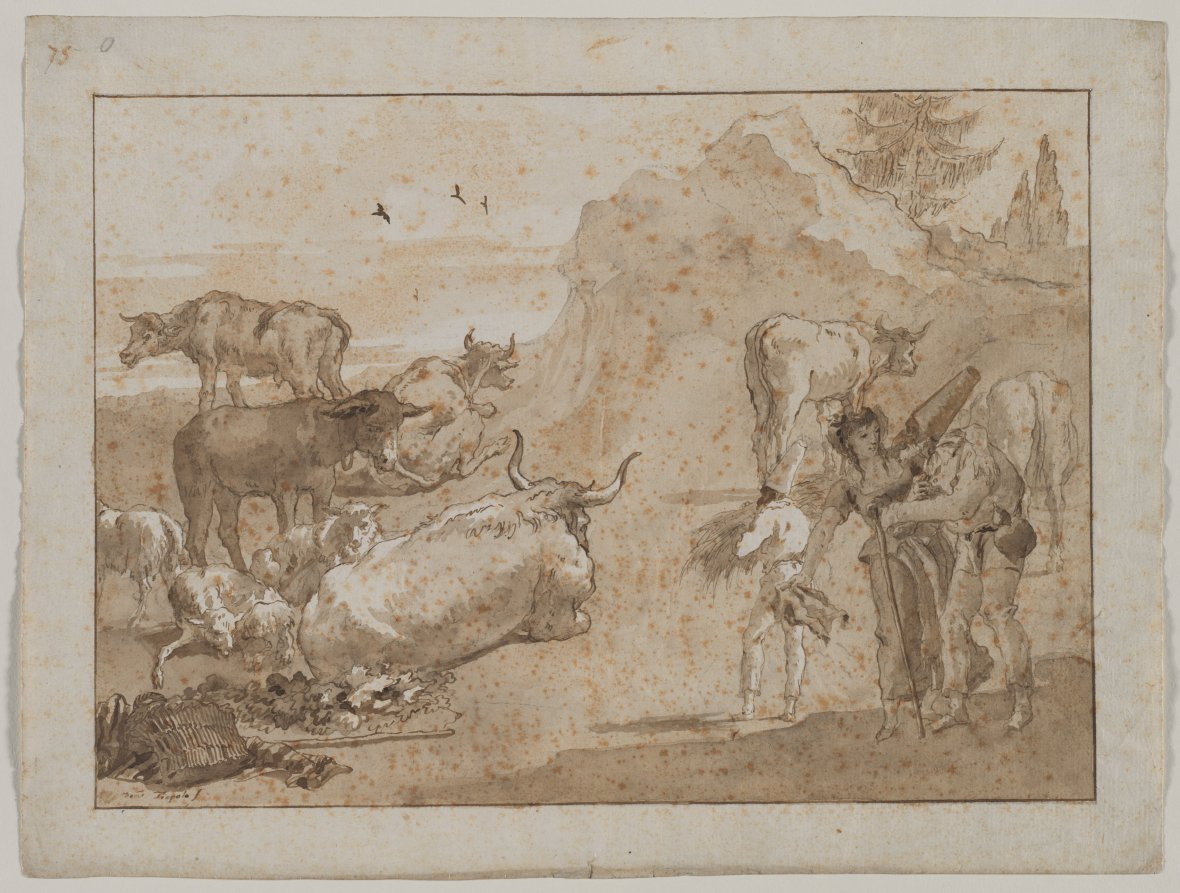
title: Sheep and Cows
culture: Italy, 18th century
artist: Giovanni Domenico Tiepolo (Italian, 1727–1804)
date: 1790s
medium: pen and brown ink and brush and brown wash, over black chalk; framing lines in brown ink and graphite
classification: Drawing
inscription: signed, lower left, in brown ink: Domo [second o has a line over it] Tiepolo f ; upper left, in brown ink: 75 [strengthened in graphite] ; upper left, in graphite: o